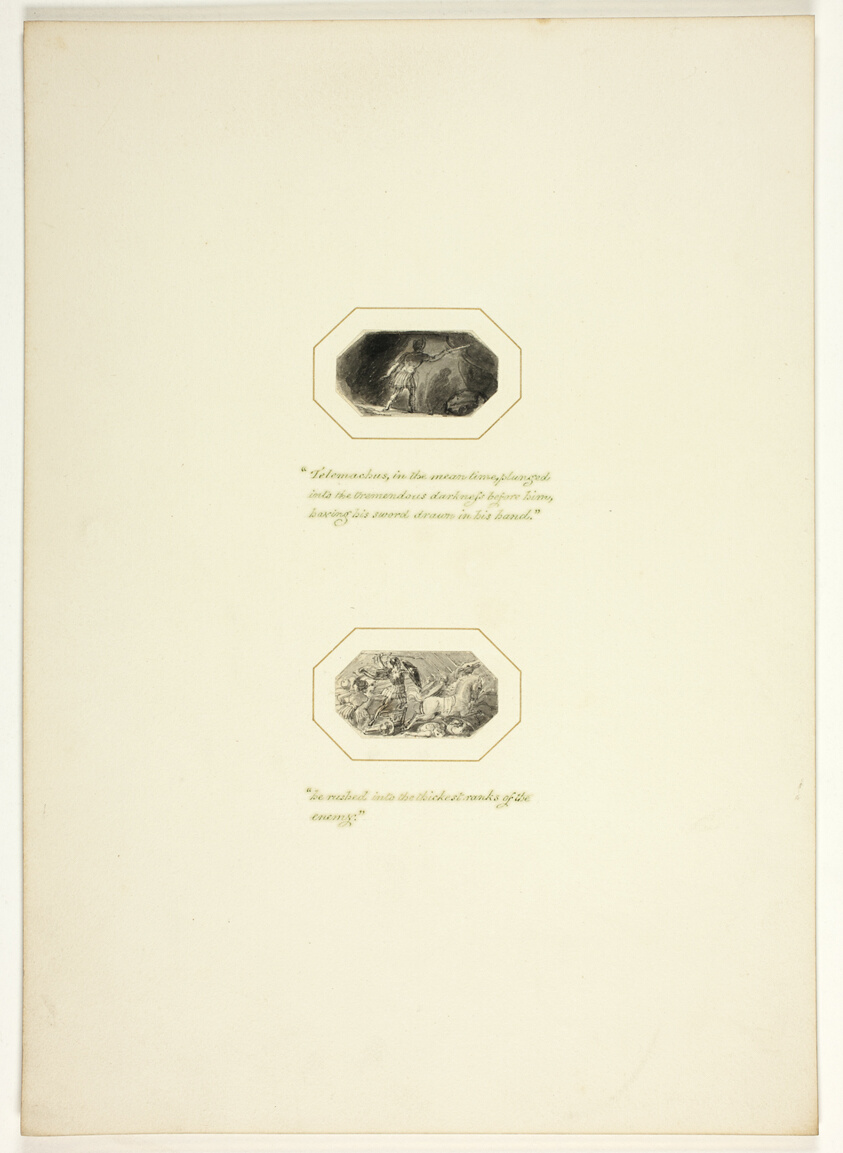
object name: Drawing and Watercolor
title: Study for a plate from Telemachus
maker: Thomas Stothard (English, 1755-1834)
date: c. 1797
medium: Ink wash on paper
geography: England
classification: ink or chalk wash; drawings (visual works); prints and drawing